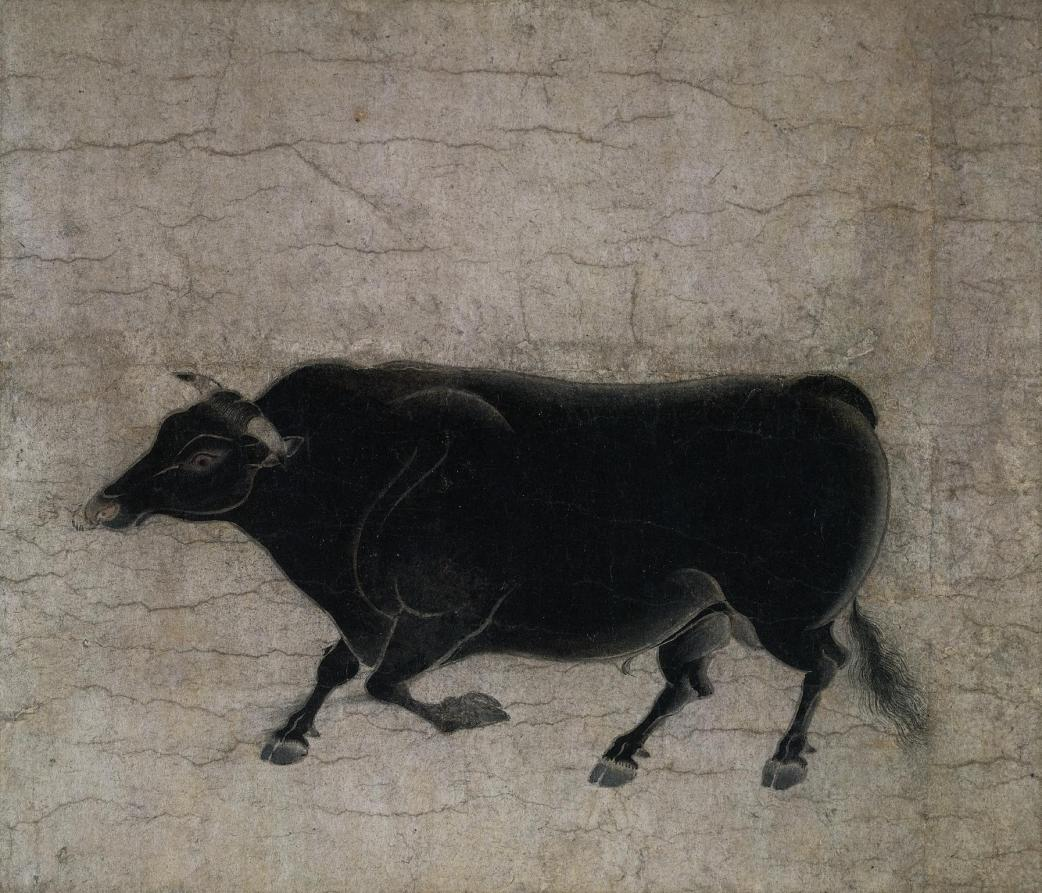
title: Swift Bull from the Ten Swift Bulls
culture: Japan, Kamakura period (1185–1333)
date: late 1200s–early 1300s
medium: section of a handscroll mounted as a hanging scroll; ink and slight color on paper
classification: Painting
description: Across the world, animals once played a much larger role in the transportation of the elite. Members of Japan’s imperial court traveled in vehicles pulled by oxen until the late 1400s, when oxcarts were restricted to ceremonial use. One sign of the past importance of the ox as a status symbol survives in this fragment from a scroll of portraits of 10 speedy bulls. The painter layered washes containing differing ratios of black ink to water to create a three-dimensional effect.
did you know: We know the original scroll had ten bulls because a copy of the complete scroll exists.